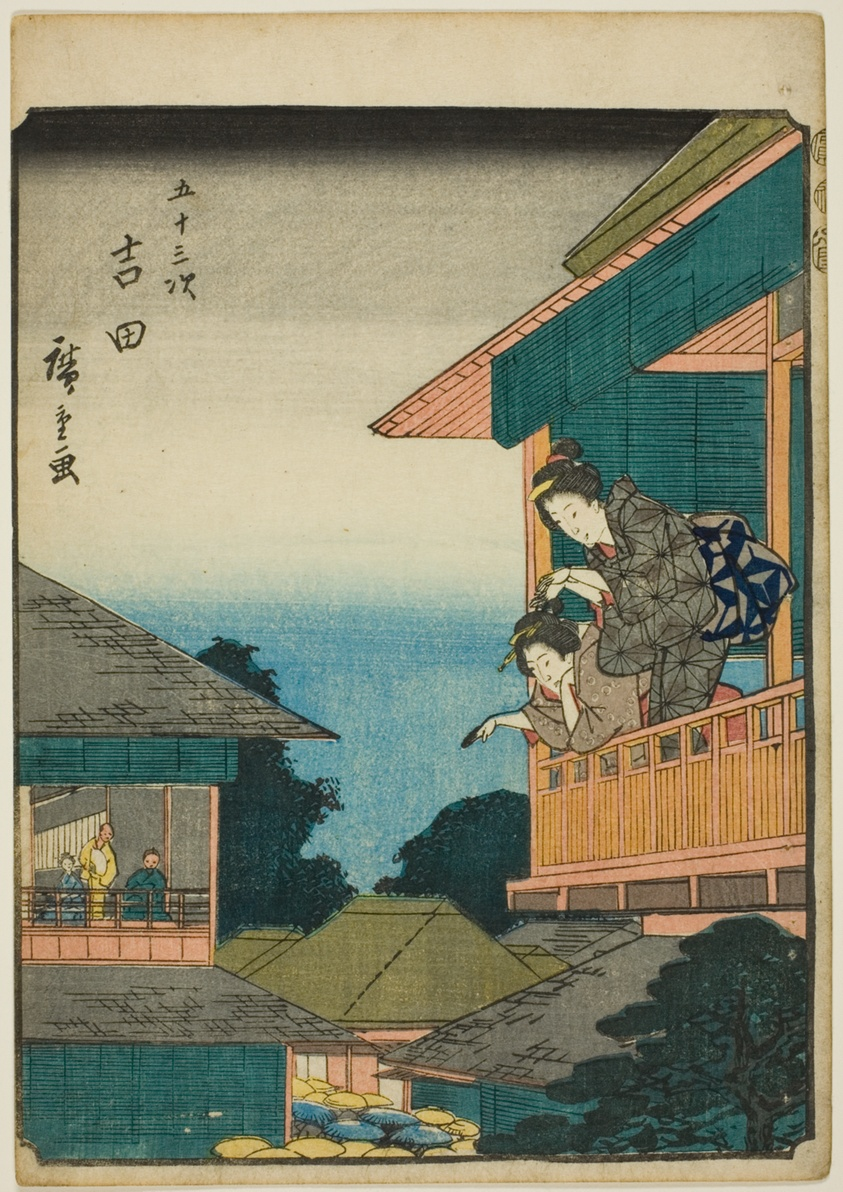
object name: Print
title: Yoshida, from the series "Fifty-three Stations [of the Tokaido] (Gojusan tsugi)," also known as the Figure Tokaido (Jinbutsu Tokaido)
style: Japanese (culture or style)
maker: Utagawa Hiroshige 歌川 広重; Japanese, 1797-1858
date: 1852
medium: Color woodblock print; chuban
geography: Japan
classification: woodblock print; print